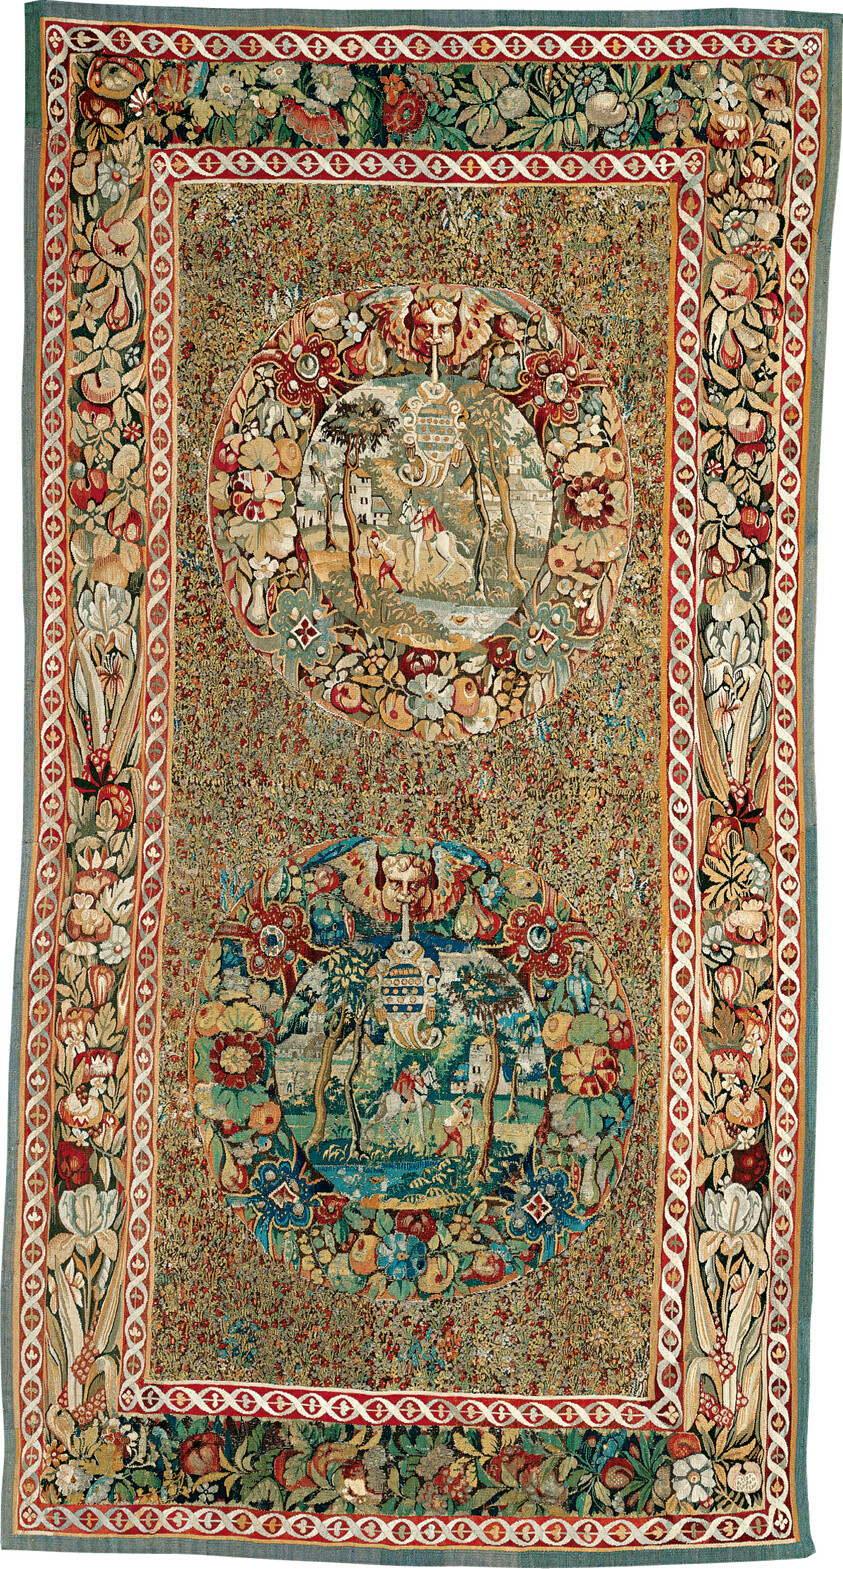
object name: Textile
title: Millefleur with Medallions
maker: Flanders, Bruges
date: 1540/60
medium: Wool, cotton and silk, slit and double interlocking and dovetailed tapestry weaves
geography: Bruges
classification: weaving - tapestry; textile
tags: coat of arms, royalty